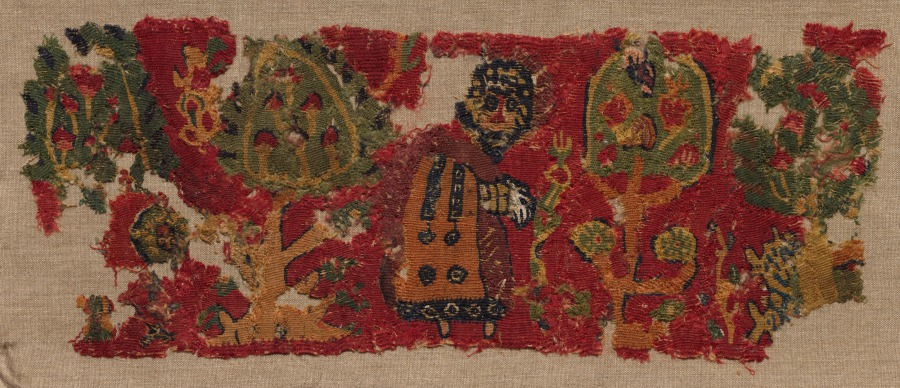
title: Fragment, Probably a Border from the Hem of a Tunic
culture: Egypt, late Abbasid or Tulunid period, 9th Century (?)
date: 800s (?)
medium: tapestry; wool and linen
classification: Textile